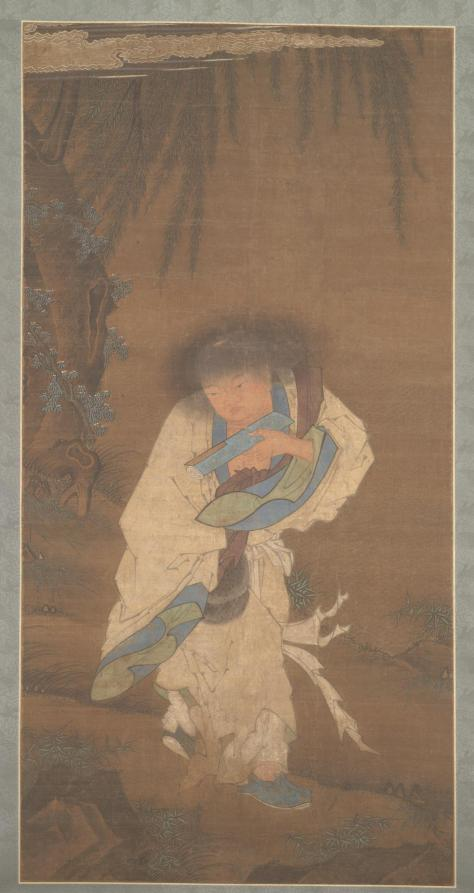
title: Poet and Recluse Hanshan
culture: China, Ming dynasty (1368–1644)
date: 1400s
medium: hanging scroll; ink and color on silk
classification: Painting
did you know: Hanshan, a Tang poet of vernacular verses, is often associated with Chan Buddhism and is considered a deity in disguise.